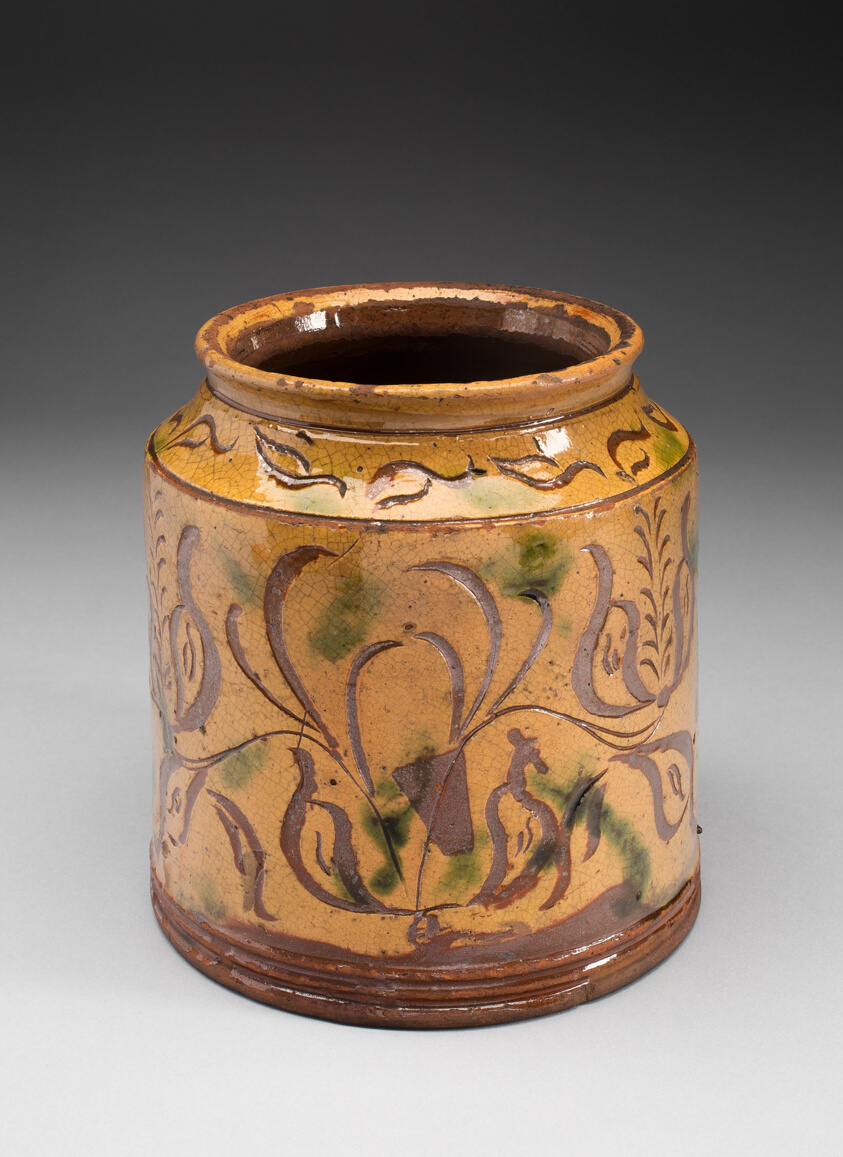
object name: Decorative Arts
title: Jar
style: pennsylvania german, american colonial, americas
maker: Artist unknown (American, active 18th–19th century); Pennsylvania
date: 1790–1840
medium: Earthenware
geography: Haycock Township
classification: vessel; american decorative arts; american arts; ceramics; decorative arts